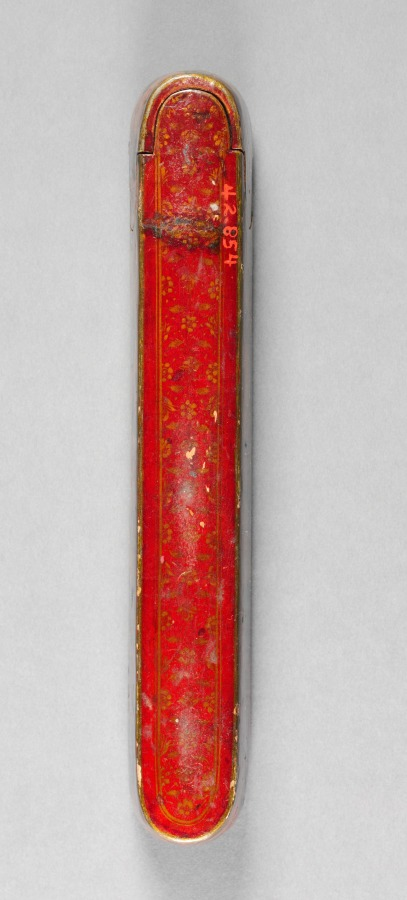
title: Pen and Ink Box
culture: Iran, Qajar period (1779-1925)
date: 1800s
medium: lacquer over papier maché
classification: Lacquer